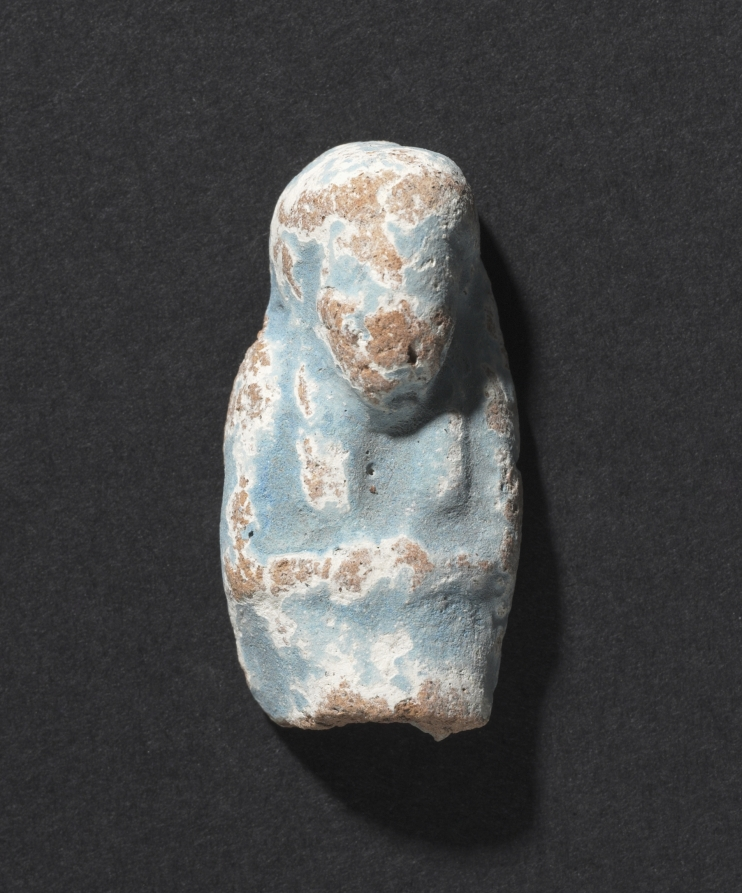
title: Shawabty of Ditamenpaankh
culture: Egypt, Late period (715–332 BCE), Dynasty 25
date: 715–656 BCE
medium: terracotta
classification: Funerary Equipment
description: High demand for shawabtys in the Late Period, a time when as many as 400 or more shawabtys were placed in the tomb with the deceased, gave rise to a specialized container for storing them: the shawabty box. This example is inscribed for the lady of the house, Ditamenpaankh, and was probably one of a pair originally made for her. The single-masted boat on the box's lid is perhaps an allusion to the pilgrimage of the deceased to the holy city of Abydos, the cult city of Osiris, king of the dead. The shawabtys inside are crude, mass-produced examples cast in an open mold. Made of terracotta, their blue paint imitates more costly shawabtys made of faience. As for the shawabty spell, it has been removed from its traditional location on the shawabty's front and relocated onto the sides of box, where it needed only to be written once, thus expediting production.